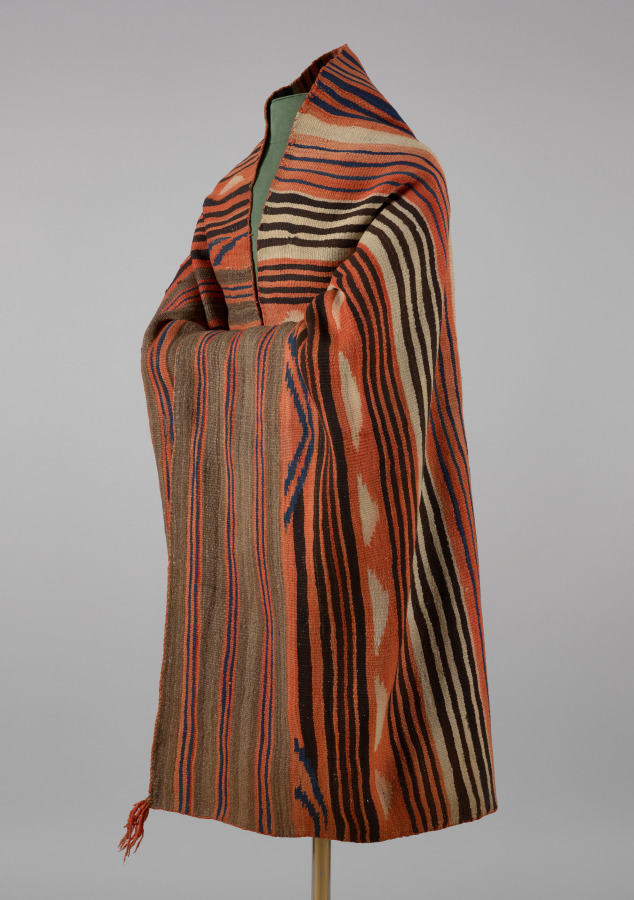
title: Banded Wearing Blanket (Diyugi)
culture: America, Native North American, Southwest, Diné (Navajo) or Zuni Pueblo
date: c. 1880–90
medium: Wool (handspun and bayeta): tapestry weave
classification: Textile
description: This blanket was created during the late 1800s, when weavers in the Southwest began to shift from making garments for Indigenous use, including trade, to additionally create items for non-Native collectors. In this new market, traditional wearing blankets, which were worn around the shoulders, were marketed as rugs.